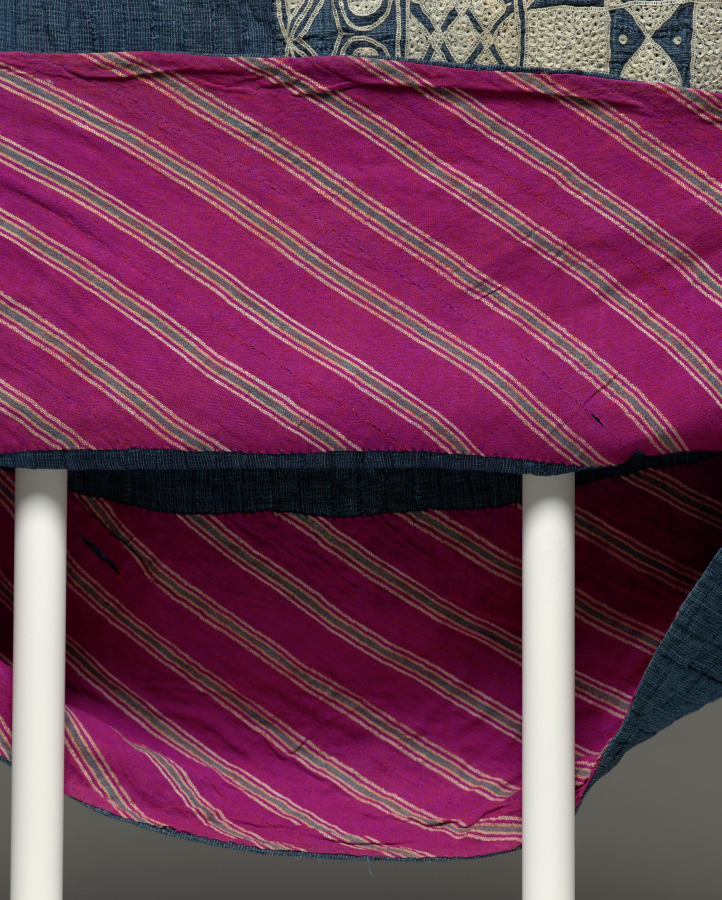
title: Prestige robe (riga)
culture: Africa, West Africa, Nigeria, probably Hausa-style or Nupe-style weavers and embroiders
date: late 1800s–by 1910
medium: Cotton, silk, and indigo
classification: Garment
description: Elite Nigerian men wore voluminous status garments variously called riga (Hausa), agbádá (Yorùbá), boubou (French), or mbubb (Wolof). Punctuated with white silk, this strip-woven riga’s inky blue was achieved by repeatedly dipping threads into indigo dye before weaving them. Embroiderers were often skilled Arabic calligraphers; the motifs here once had protective Islamic symbolism. The front pocket features the pointed “eight knives” (aska takwas) and a leaf (gambiya) associated with the Nupe peoples. At back, a spiral leads the wearer toward God. Magenta silk imported via trans-Saharan routes lines the hem. Rigan historically held transcultural appeal; today, they are pan-Nigerian male national dress.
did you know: Its owner's movements would have revealed a flash of magenta silk (an expensive trade good) along the hem of this riga, emphasizing his high status.